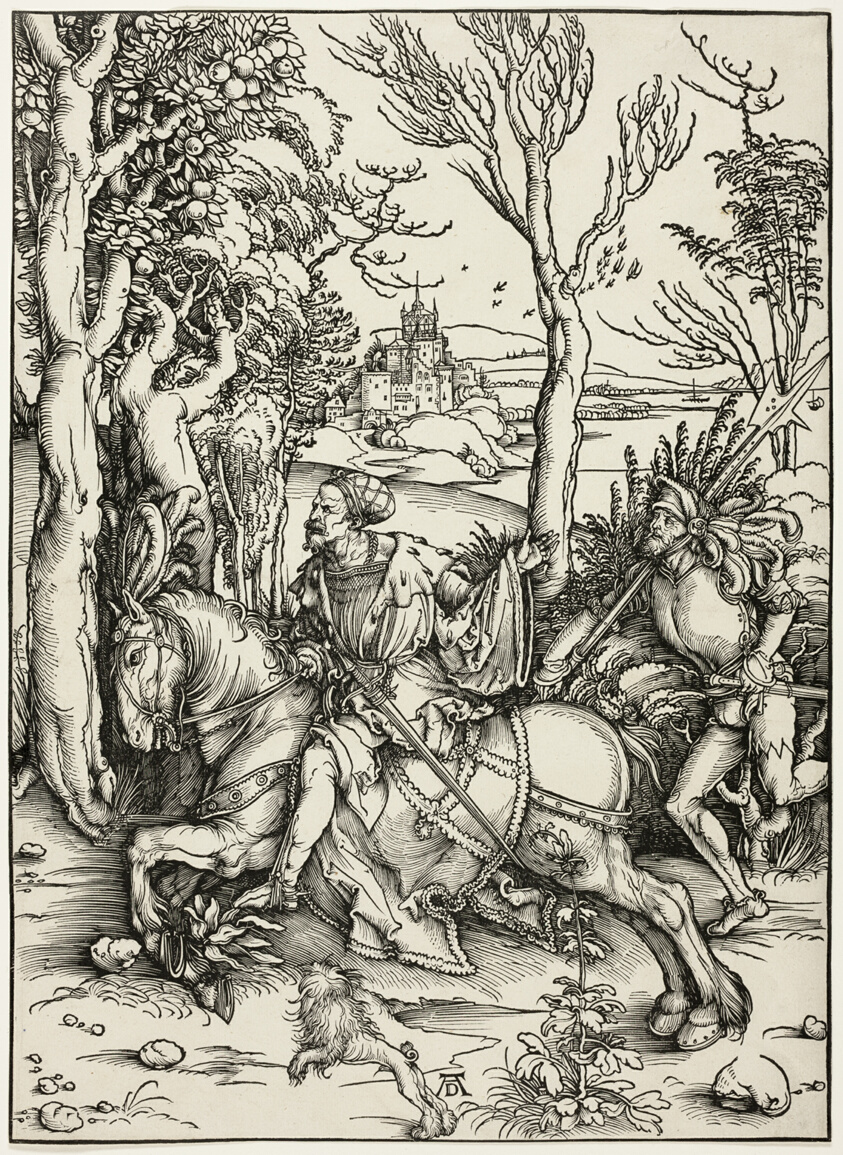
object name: Print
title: Knight and Landsknecht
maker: Albrecht Dürer (German, 1471-1528)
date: c. 1496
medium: Woodcut in black on ivory laid paper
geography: Germany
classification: woodcut; print; prints and drawing; paper